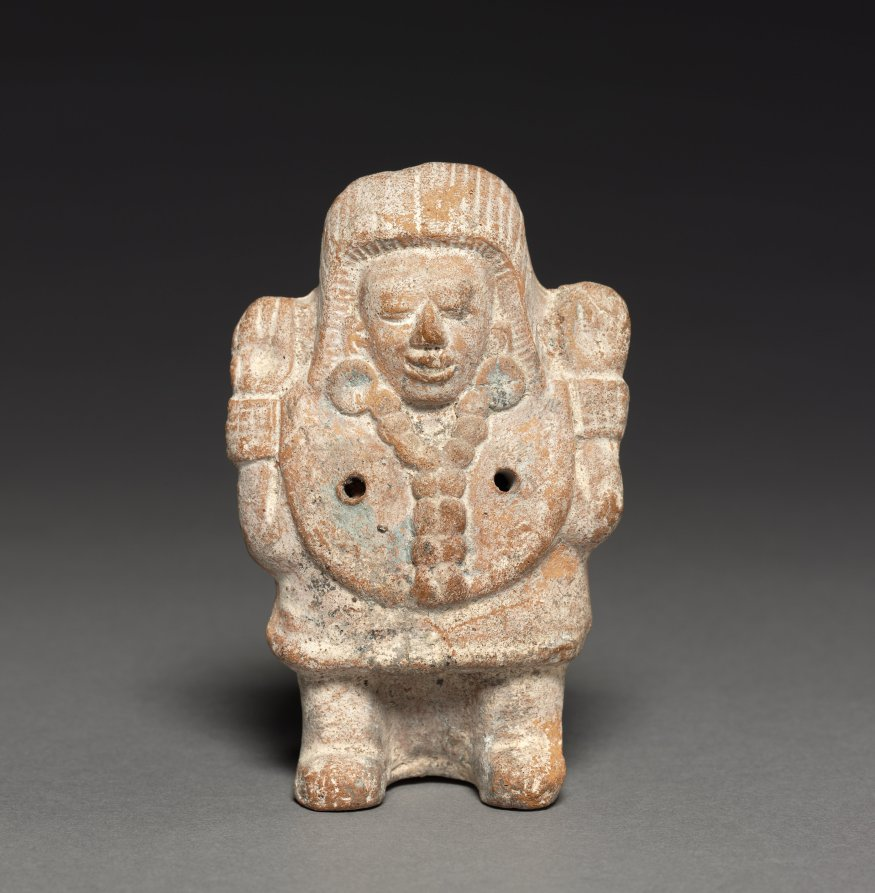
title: Female Figurine Rattle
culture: Mexico, Campeche, Jaina Island, Maya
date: 600–900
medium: Ceramic, pigment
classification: Sculpture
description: This hollow, mold-made figurine contains pellets that transform it into a rattle used as a musical instrument, perhaps during household rituals.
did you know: This hollow, mold-made figurine contains pellets that transform it into a rattle.